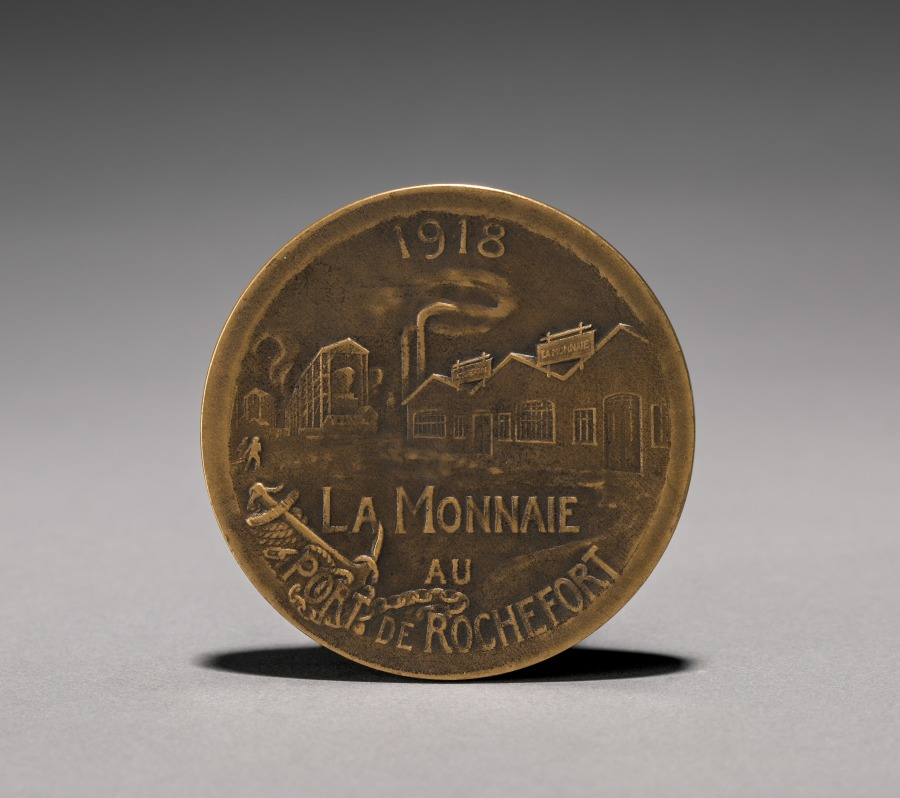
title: Medal (reverse)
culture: France, 20th century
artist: Edmond-Eugene-Emile Lindauer (French, 1869–1942)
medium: bronze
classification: Metalwork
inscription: "La Monnaie au Port de Rochefort."